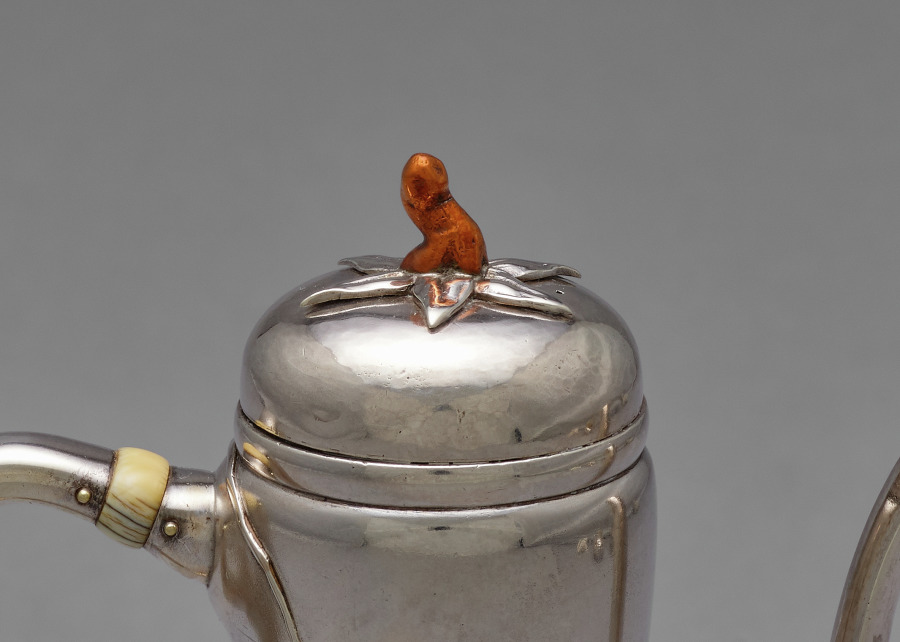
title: Coffee Pot (lid)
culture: America, New York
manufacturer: Tiffany & Co. (America, New York, est. 1837)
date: c. 1879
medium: silver inlaid with copper and gold, ivory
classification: Silver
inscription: engraved: E.J.W.B./from/A.M./Xmas 1879. (The A.M. may refer to Alfred Morrison, a wealthy man who supported contemporary decorative arts by collecting them for his London house.)